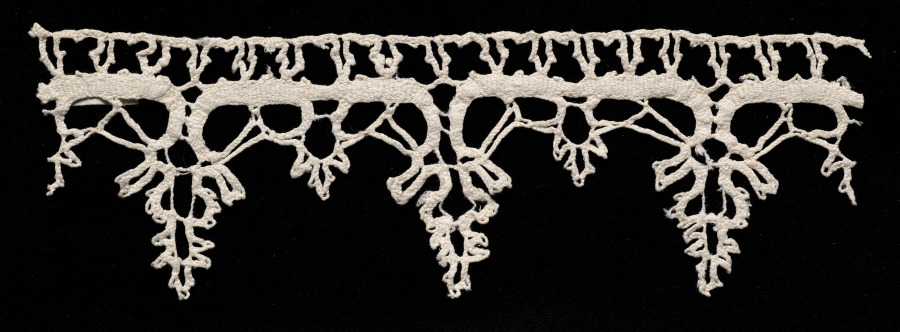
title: Lace Edging of Points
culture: Italy, Venice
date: 1500s–1600s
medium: Bobbin lace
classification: Lace